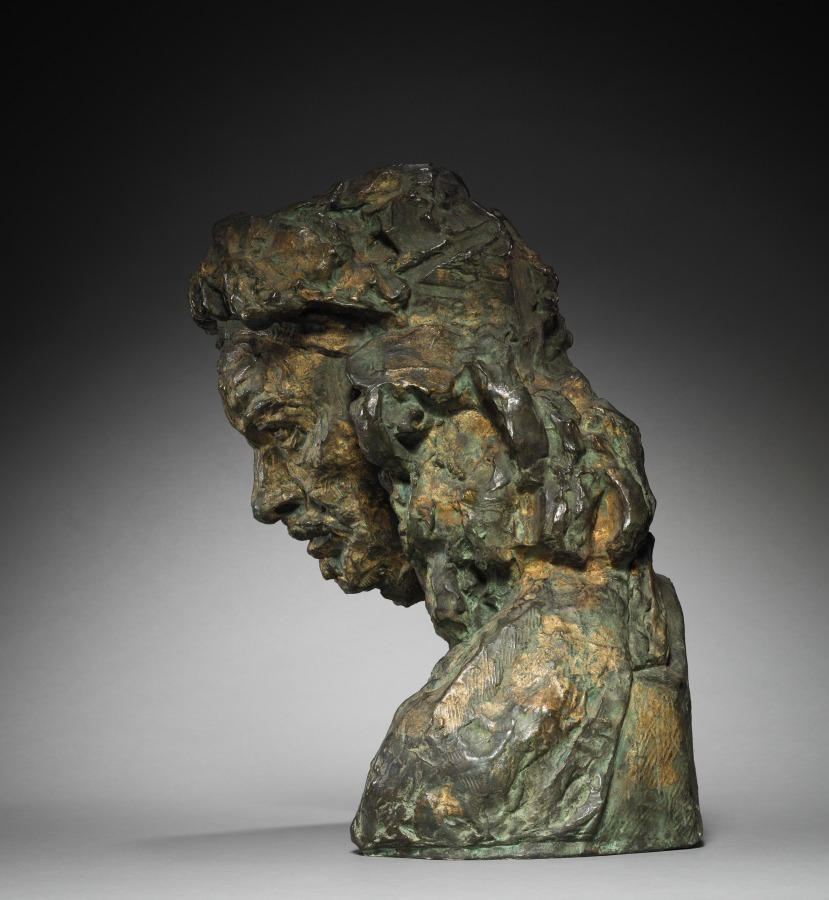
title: The End of Rembrandt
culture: France, 20th century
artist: Emile Antoine Bourdelle (French, 1861–1929)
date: 1909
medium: bronze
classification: Sculpture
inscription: Dated: "1909"